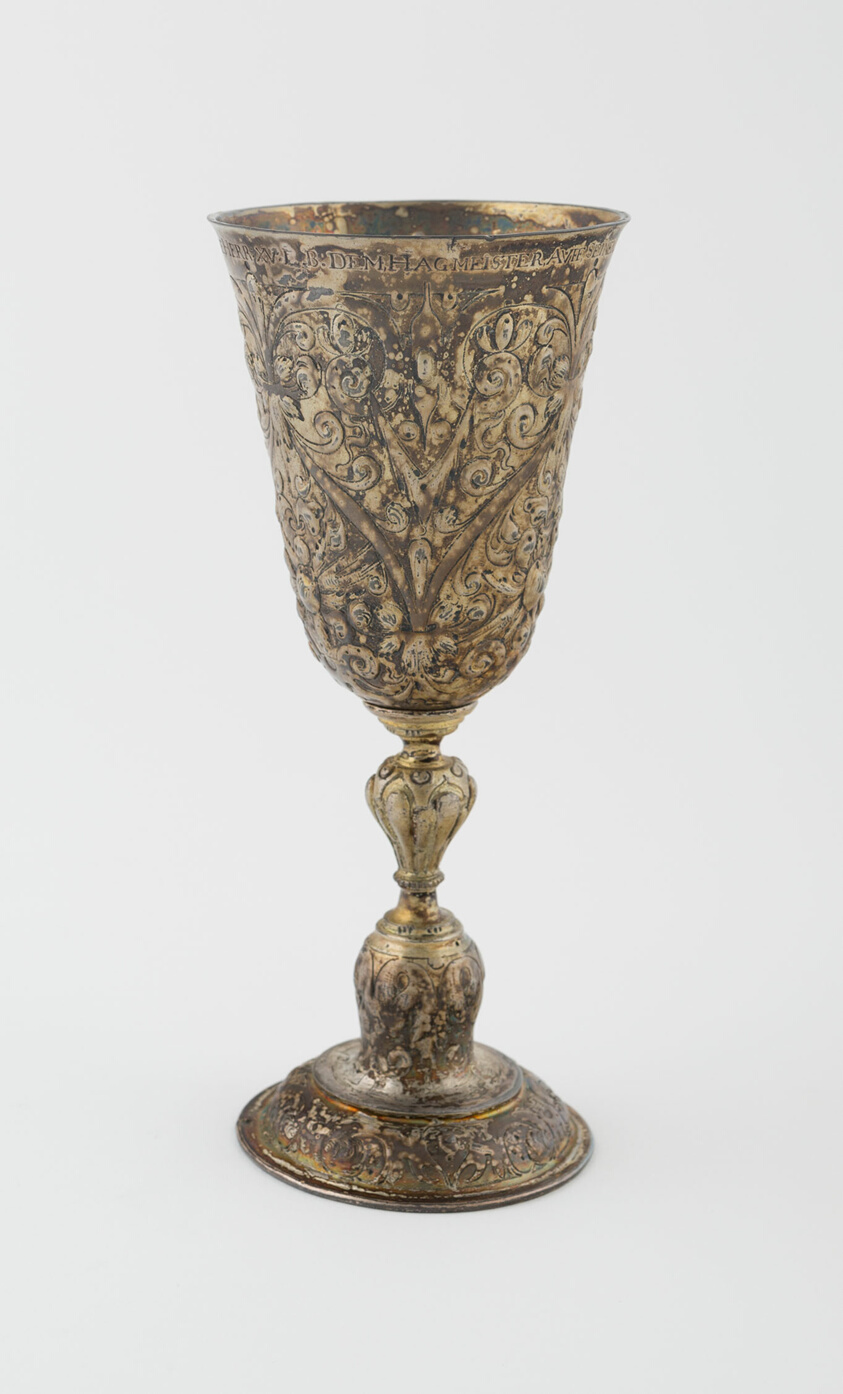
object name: Metalwork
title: Cup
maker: L. Umbach (German, early 17th century)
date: c. 1600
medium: Silver gilt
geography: Augsburg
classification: drinking vessel; silver; metalwork; european decorative arts